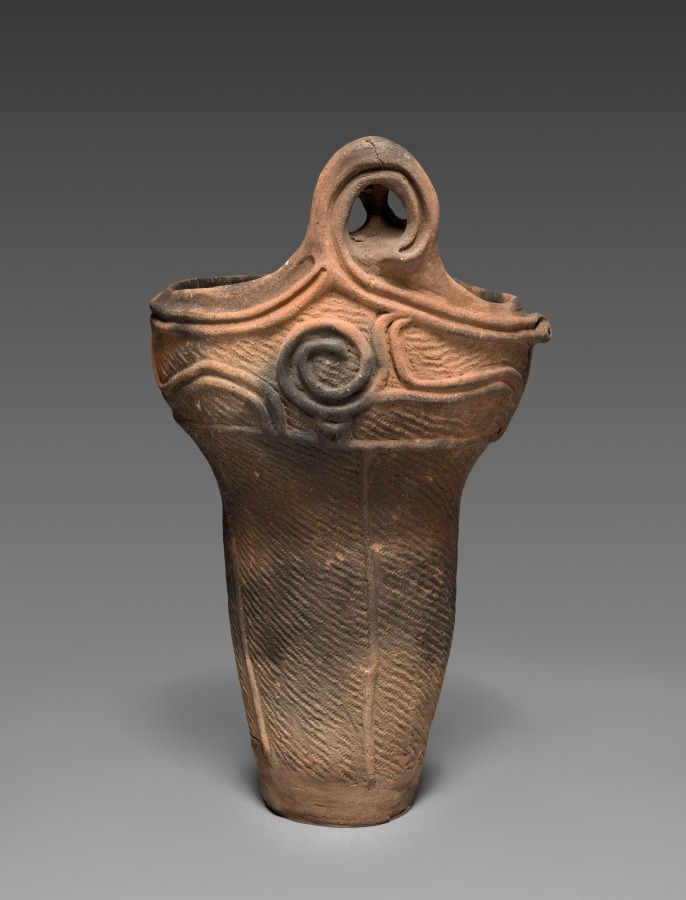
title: Cooking Vessel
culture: Japan, Jōmon period (c. 10,500–300 BCE)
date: c. 2500 BCE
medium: earthenware with impressed and applied designs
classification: Ceramic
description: This asymmetrical vessel has designs made by pressing cord or rope onto the damp clay and cylinders of clay applied to the surface. Based on its designs and shape, it was likely produced in the northern Kanto region. For reasons unknown today, different regions created signature styles.